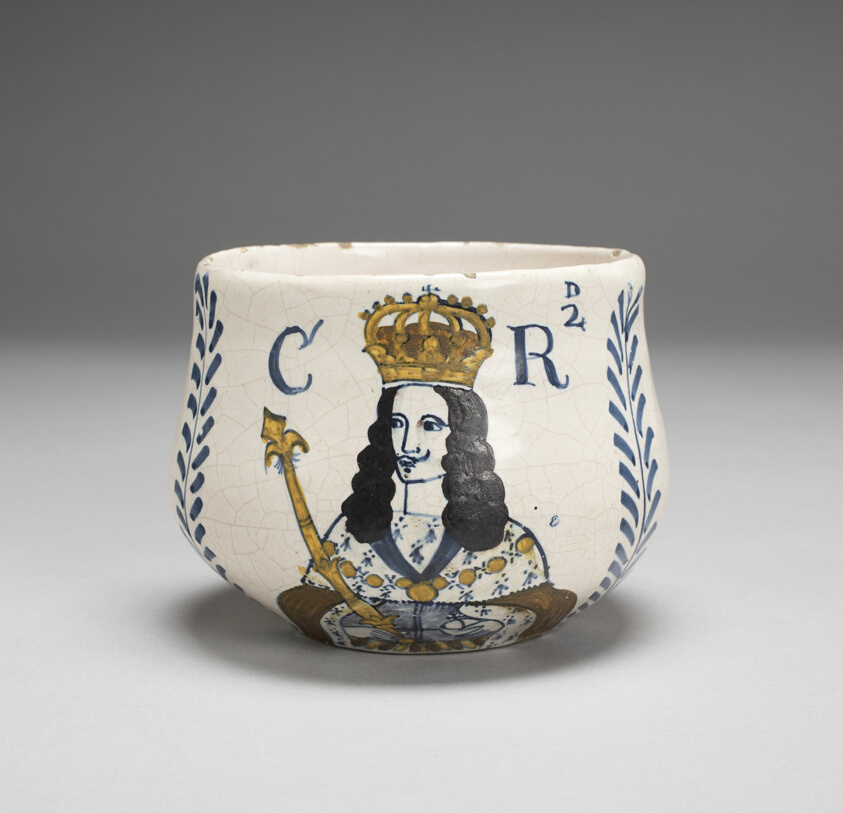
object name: Ceramics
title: Caudle Cup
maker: Lambeth, England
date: 1668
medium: Tin-glazed earthenware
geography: Lambeth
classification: drinking vessel; earthenware; european decorative arts; ceramics